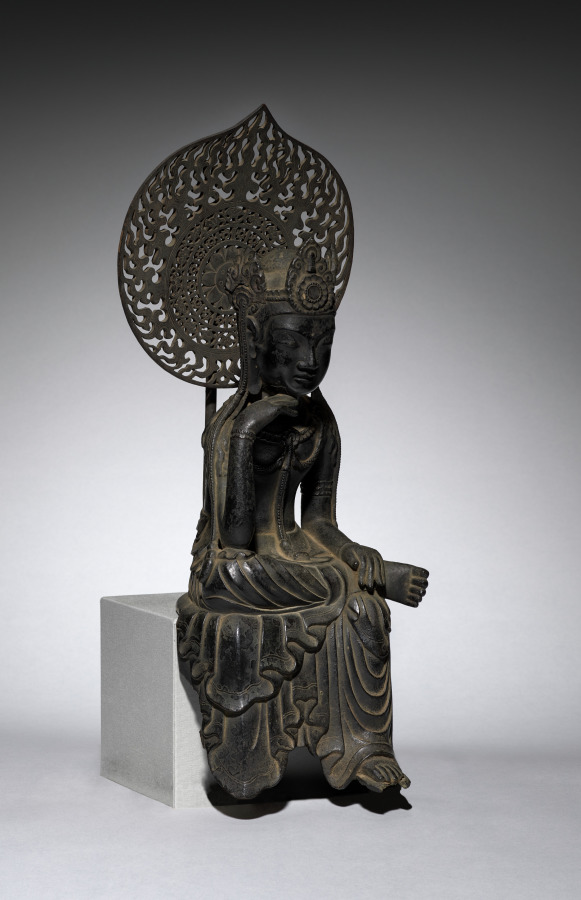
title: Buddha of the Future (Miroku Bosatsu)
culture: Japan, Asuka period (538–710)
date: late 600s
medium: cast bronze, incised, with traces of gilding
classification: Sculpture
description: Buddhism was introduced to Japan in the sixth century. For early Japanese devotees, Buddhism offered the promise of salvation through faith in the Buddha of the Future, who would appear at the end of the world. The concept of eternal salvation held particular resonance with the Japanese aristocracy, who became the staunchest supporters of this new faith. Small sculptures like this one, with its gentle grace and powerful presence, were popular devotional objects.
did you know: The Sanskrit name of this being, Maitreya, derives from the Sanskrit word for friend, mita.